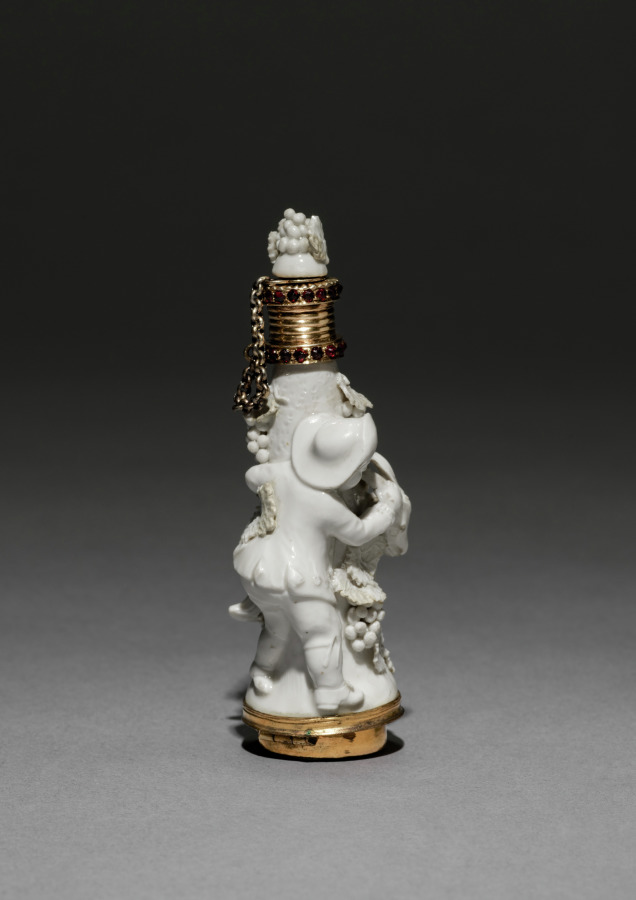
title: Scent Bottle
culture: England, Chelsea, mid-18th century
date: mid 1700s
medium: soft-paste porcelain with gilt metal mounts set with red faceted stones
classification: Miscellaneous